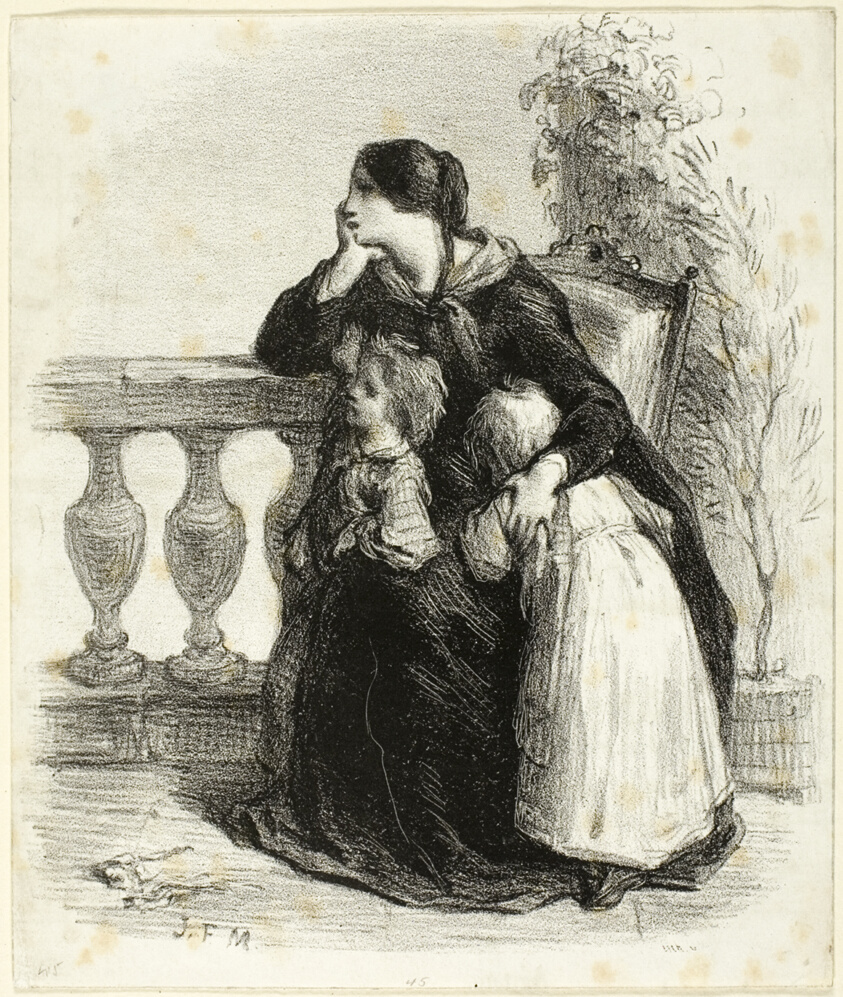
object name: Print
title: Where Can He Be?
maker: Jean François Millet (French, 1814-1875); published by Barnard Latte; composed by Frédéric Lebel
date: c. 1848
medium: Lithograph with scraping on stone on ivory wove paper with sheet music verso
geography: France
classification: lithograph; print; prints and drawing